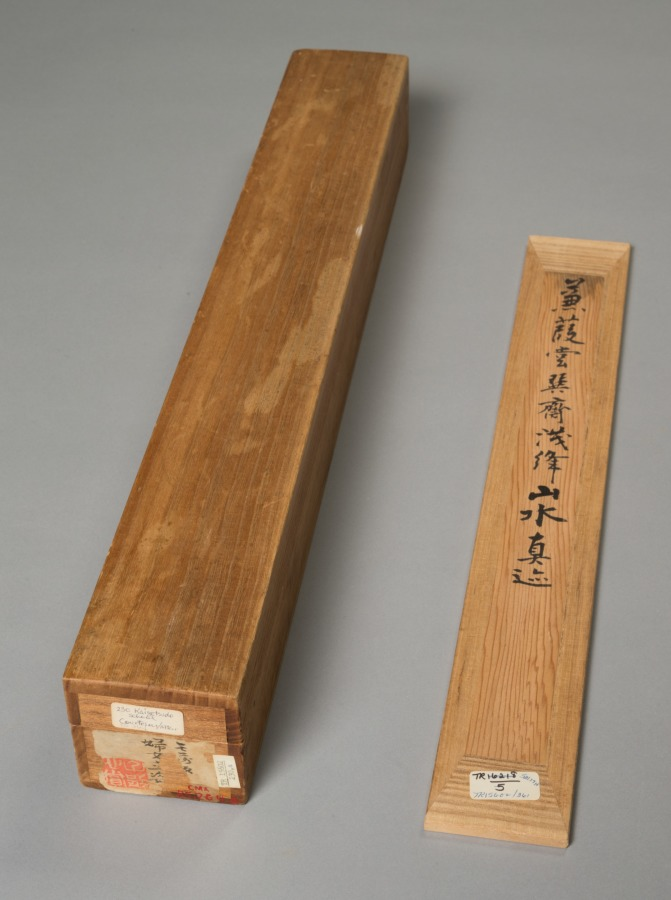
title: Courtesan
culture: Japan, Edo period (1615–1868)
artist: studio of Kaigetsudō Ando (Japanese, c. 1671–1743)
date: 1700s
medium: hanging scroll; ink and color paper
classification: Painting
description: Paintings of the courtesans who provided men with a sophisticated menu of appealing fashions, flattery, witty banter, music, dancing, and sexual services in the Yoshiwara district of the city of Edo (Tokyo) were the bread and butter of the Kaigetsudō studio, in whose style this work is painted. Their paintings emphasized bold, sweeping calligraphic ink lines in rendering the figures’ forms, along with high-contrast colors and patterns in their typically solitary subjects’ garments. Aside from the occasional prop or poem, the space around the dramatic figure was left entirely blank.